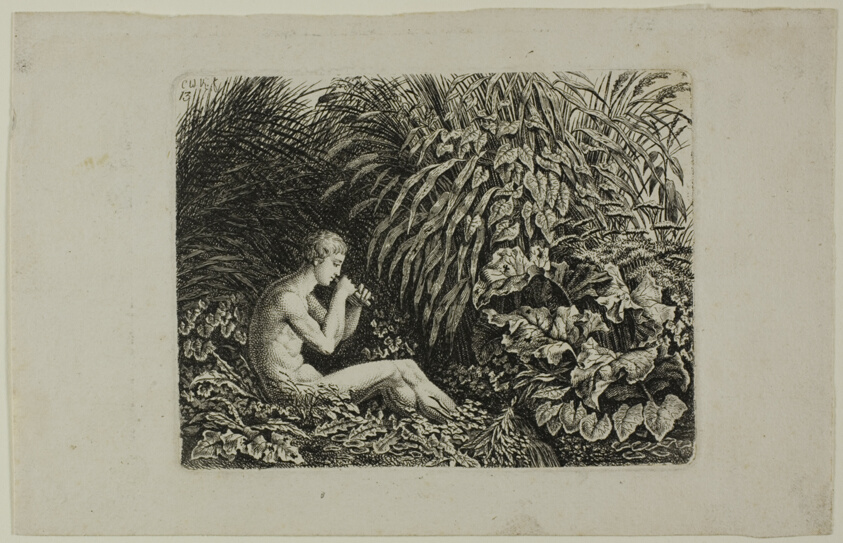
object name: Print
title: Youth Playing Pipes of Pan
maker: Carl Wilhelm Kolbe, the elder (German, 1759-1835)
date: 1800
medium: Etching on paper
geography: Germany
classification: etching; print; prints and drawing